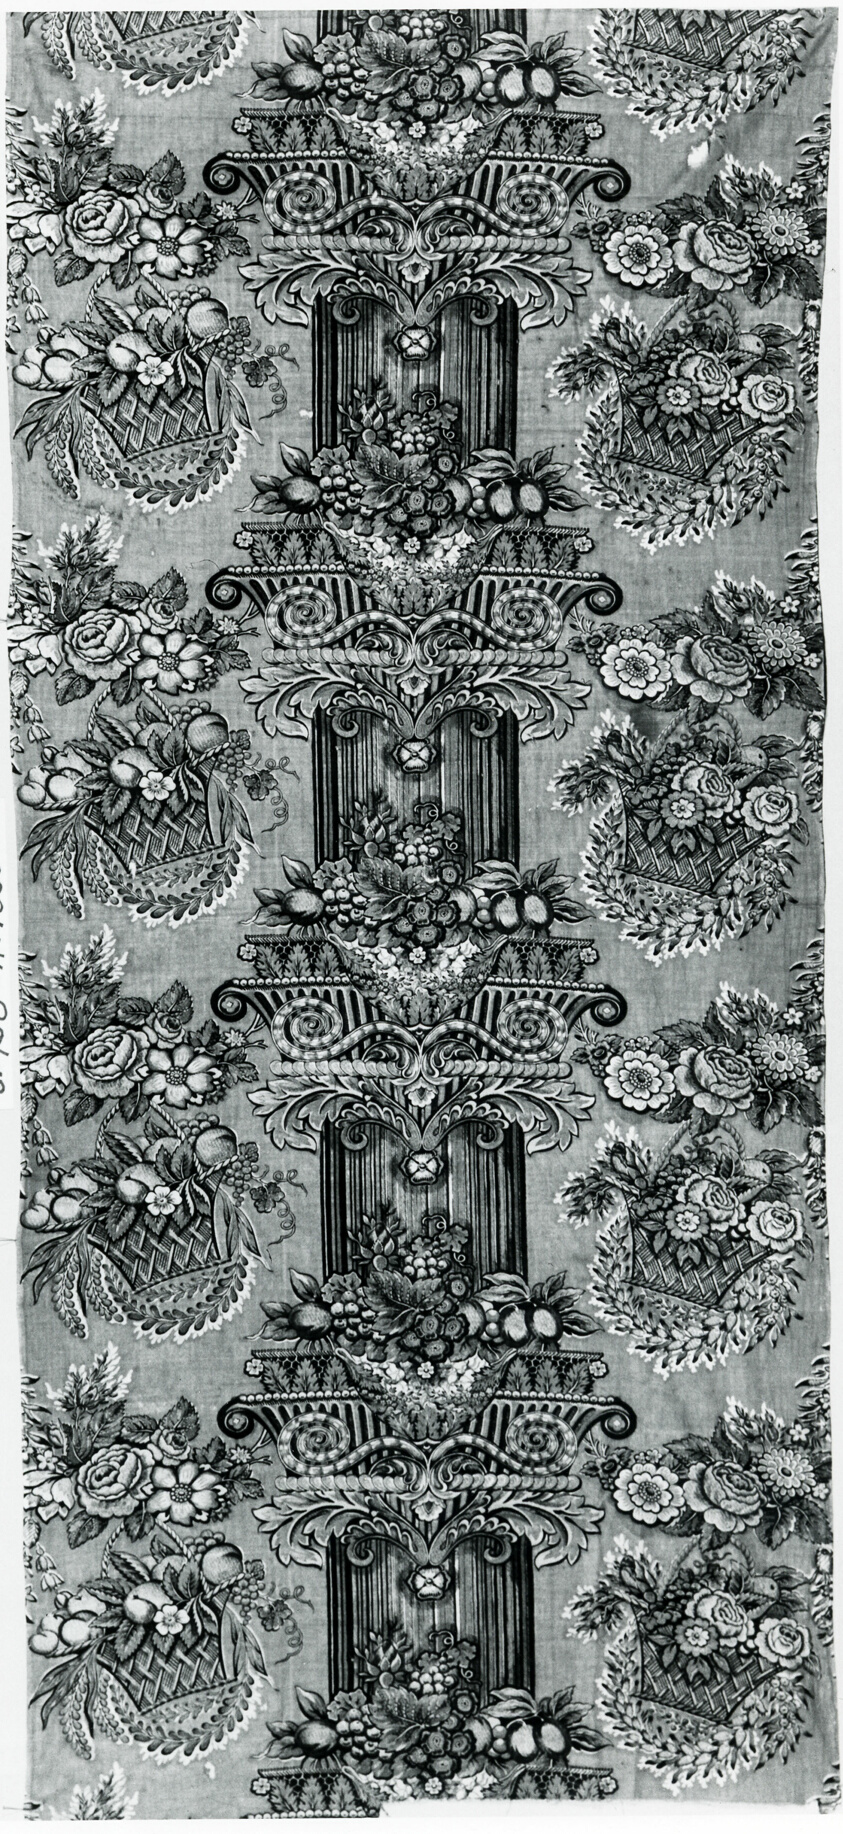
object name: Textile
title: Panel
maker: England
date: c. 1830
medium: Cotton, plain weave; block printed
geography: England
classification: textile; weaving - printed